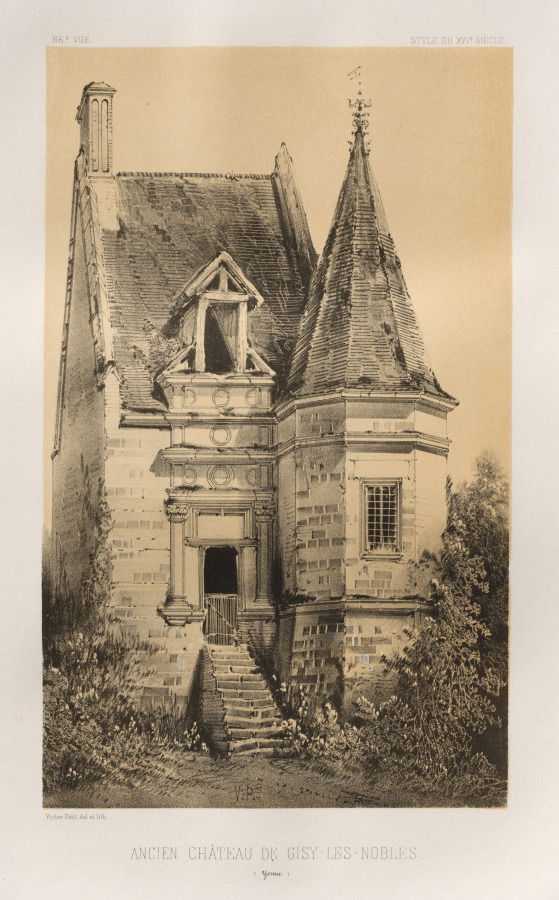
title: Architecture Pittoresque ou Monuments des XVeme. Et XVIeme. Siecles: Chateaux de France des XV et XVI Siecles: Pl. 86, Ancien Château de Gisy-Les-Nobles (Yonne)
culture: France, 19th century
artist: Victor Petit (French, 1817–1874)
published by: Charles Boivin (publisher and editor); Lith de Godard a Paris (printer)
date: 1860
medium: lithograph with tint stone, from portfolio of 100 lithographs with tint stone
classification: Print